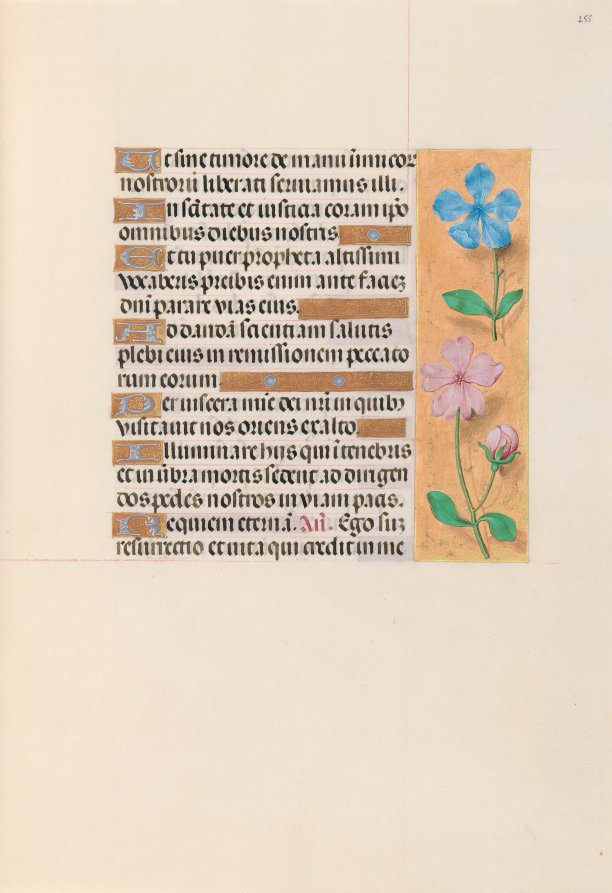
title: Hours of Queen Isabella the Catholic, Queen of Spain: Fol. 255r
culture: Flanders, Ghent and Bruges, late 15th century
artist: Master of the First Prayerbook of Maximillian (Flemish, c. 1444–1519)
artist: and Associates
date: c. 1500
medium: ink, tempera, and gold on vellum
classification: Bound Volume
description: This manuscript was illuminated by a circle of at least five highly organized manuscript painters active in the Flemish cities of Ghent and Bruges. The principal illuminator was Alexander Bening, who painted the majority of the book's miniatures. Manuscripts produced by this circle of artists are renowned for the decoration of their borders, which typically feature a rich variety of realistically-painted flowers, birds, and butterflies. This prayer book, called a book of hours, was intended not for a cleric, but for the private devotions of a lay person-in this case, Isabella the Catholic, Queen of Spain (1451-1504). Isabella's coat of arms embellishes the book's frontispiece. It is unlikely that the book was commissioned by the Queen herself; rather, she probably received it as a diplomatic gift from someone courting her patronage, perhaps Cardinal Francisco Jimenez de Cisneros. A Franciscan friar, Jimenez was dependent upon Isabella for his advancement, first to the post of Queen's confessor in 1492, and then to Archbishop of Toledo in 1495.